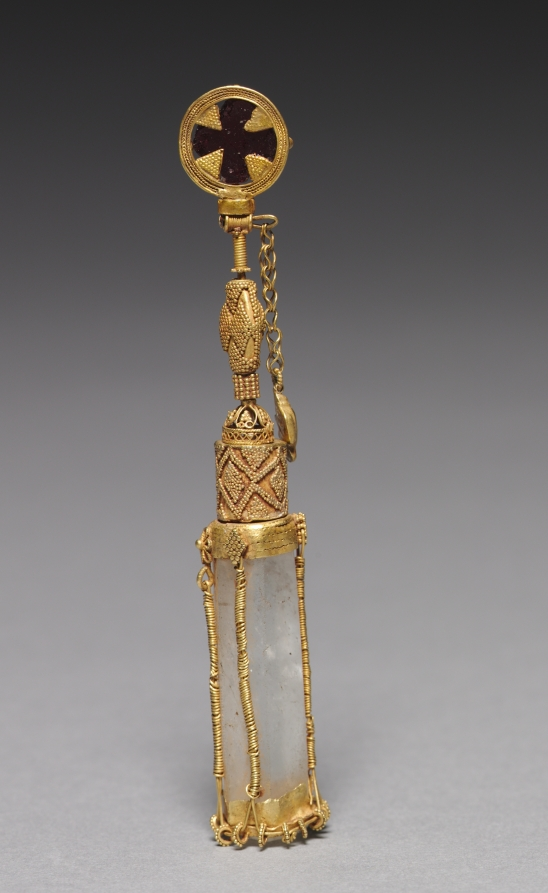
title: Mounted Rock Crystal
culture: Byzantium, Byzantine period, 6th-7th centuries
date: 500s-600s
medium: gold, quartz, almandine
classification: Metalwork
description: When this object was acquired, it was thought to be a container for holy oil or another sacred relic or substance. However, closer examination revealed that the rock crystal prism at the object’s core is completely solid, leaving no room in which to insert such matter. The object’s original function thus remains unclear. It may have served as an amulet, a magical object meant to protect its owner from evil and mishaps.